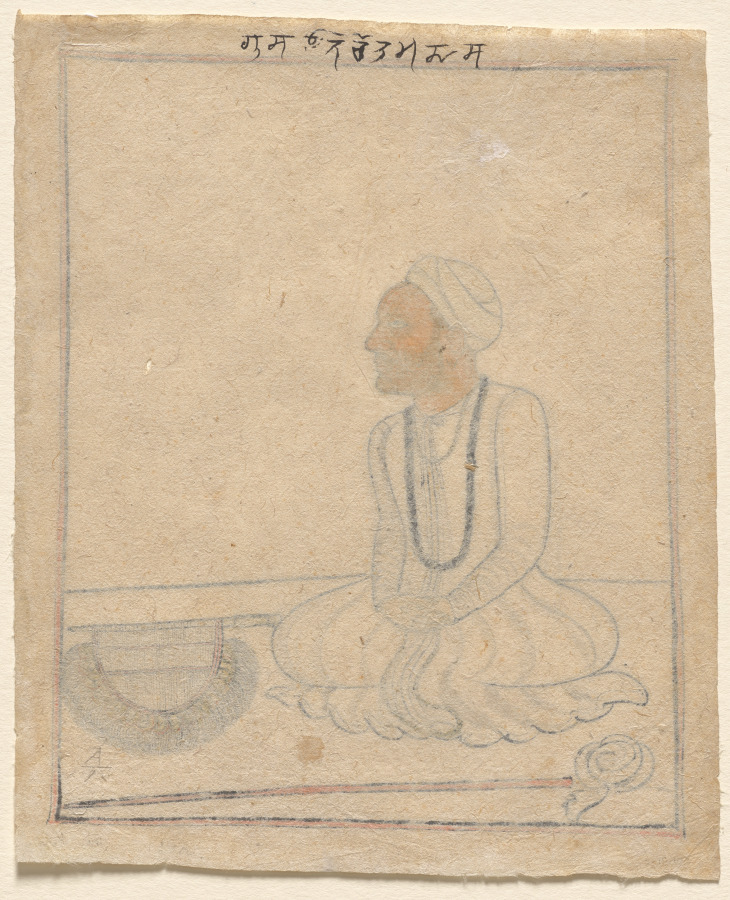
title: Gosain Narottam Das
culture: Northern India, Pahari kingdoms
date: c. 1720–30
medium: gum tempera and ink on paper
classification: Painting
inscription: Inscription in Takri on reverse: "Gusain Narottam Das" (Gosain Narottam Das)